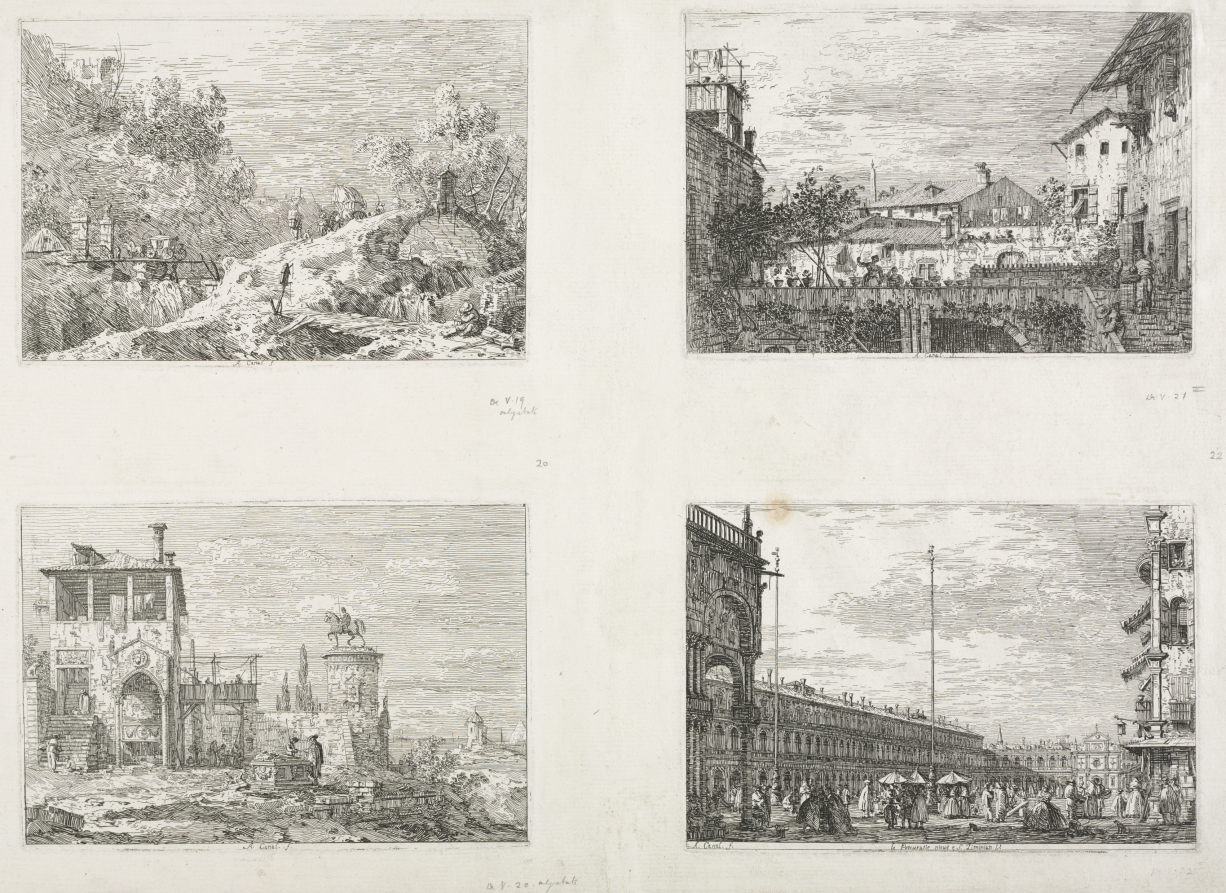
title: Views: The Equestrian Monument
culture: Italy, Venice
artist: Antonio Canaletto (Italian, 1697–1768)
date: 1735–1746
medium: etching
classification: Print